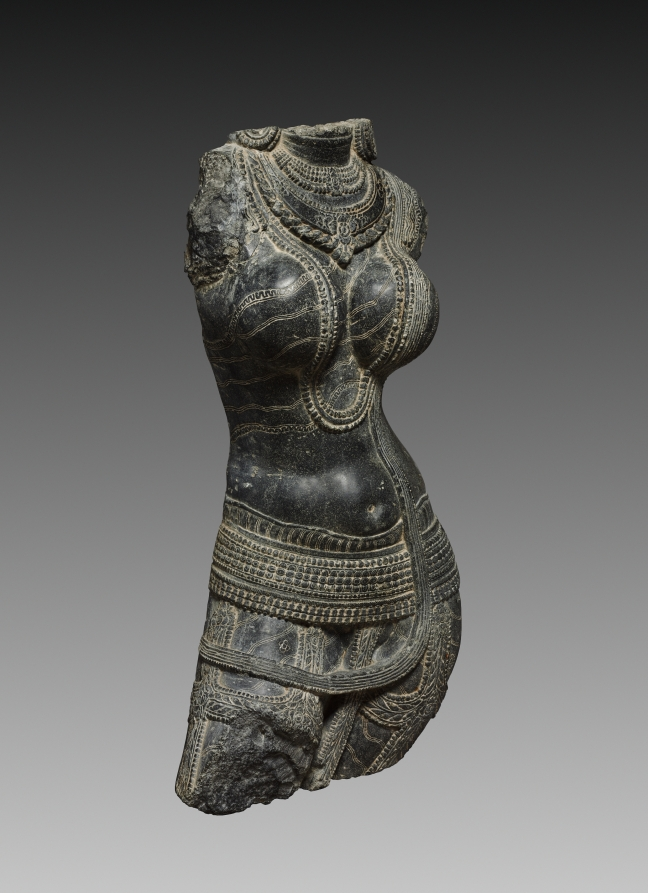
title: Female torso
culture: Northeastern India, Pala dynasty (730-1197)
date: 1000s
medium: black chlorite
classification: Sculpture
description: This life-size sculpture of a female figure was likely installed by a doorway or in an exterior niche of a Buddhist temple. Throughout the history of Indian art, voluptuous female figures have adorned Buddhist sanctuaries. Embodying the Indian ideal of female beauty, the form of the young mother with full breasts of milk personifies abundance, nourishment, and productivity—ideas that were considered auspicious and life affirming. Her copious jewels and valuable textiles also visually relate that the good karmic actions of venerating the Buddha and following his teachings will result in abundant good fortune.